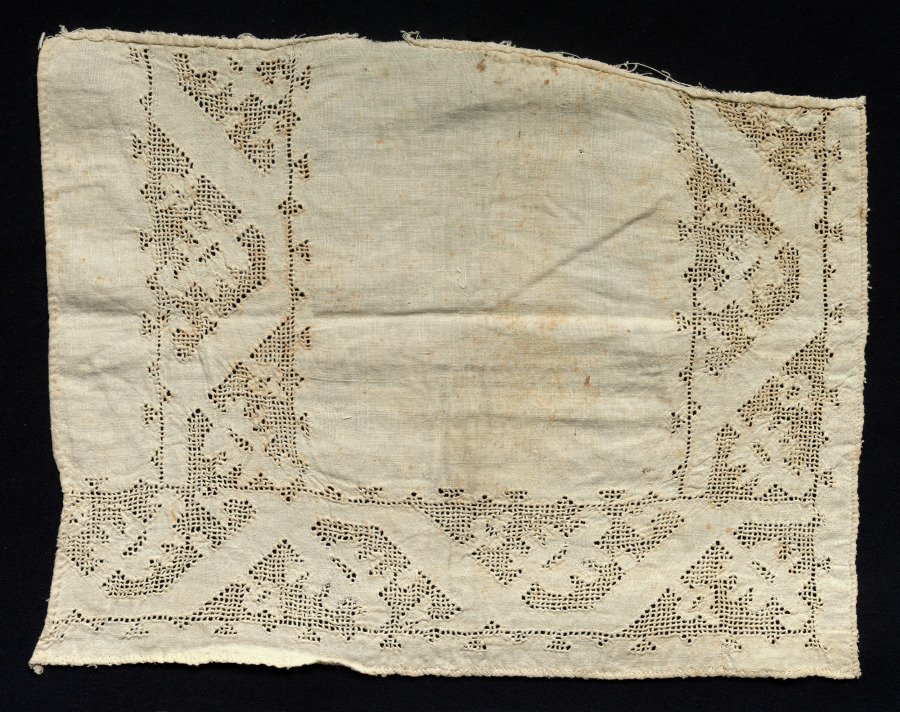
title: Fragment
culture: Italy, Sicily, 1500s-1600s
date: 1500s-1600s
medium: Linen: needle lace (drawnwork)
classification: Lace